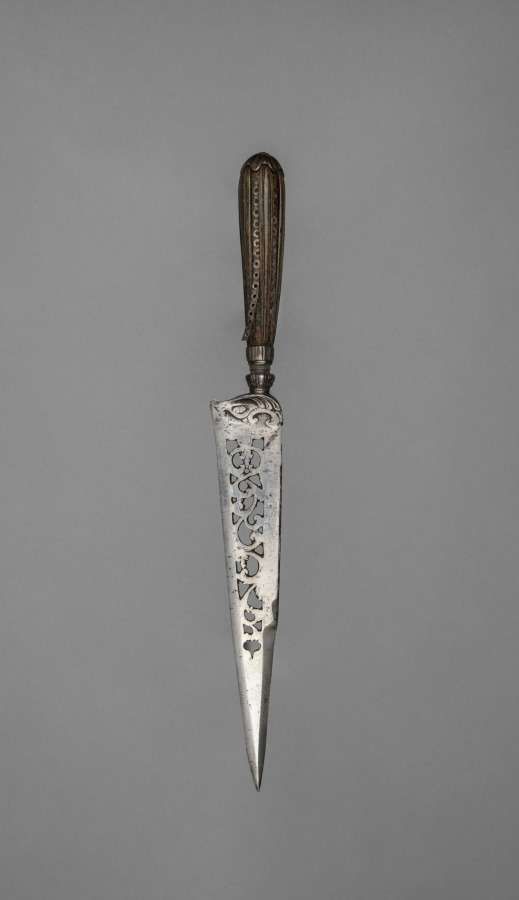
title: Knife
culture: Spain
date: 1700s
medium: steel blade, groove horn handle with sunken silver bands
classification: Arms and Armor